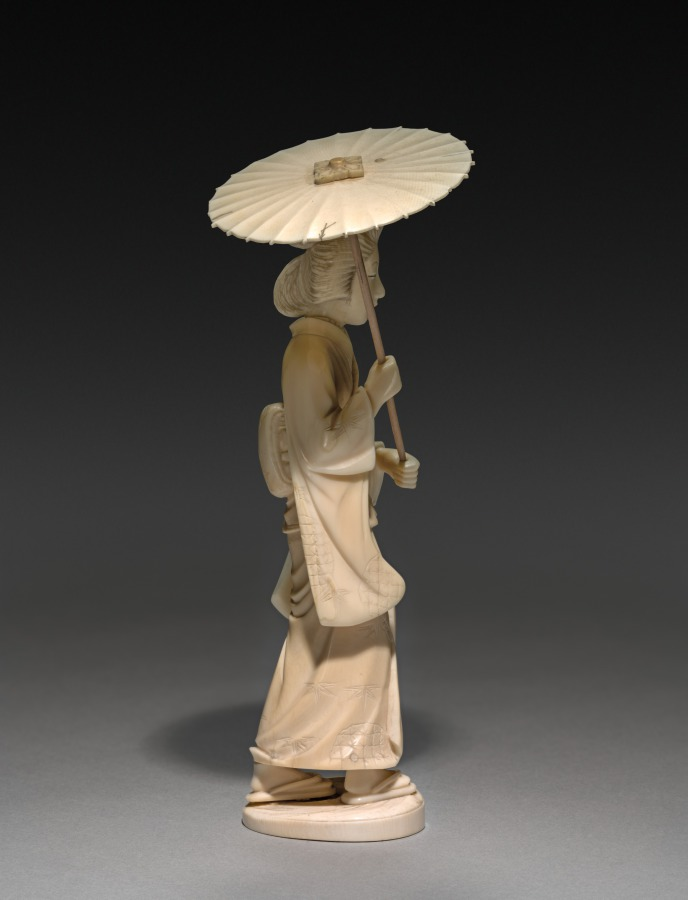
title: Woman Carrying a Parasol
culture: Japan, Meiji period (1868–1912)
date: Late 1800s- Early 1900s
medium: ivory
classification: Ivory